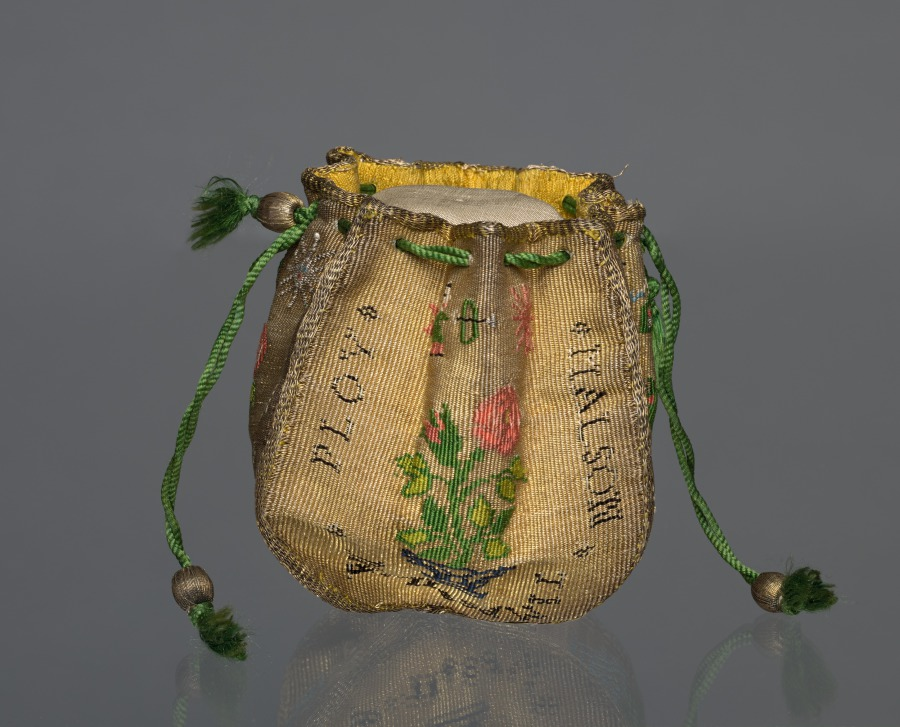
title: Woven Purse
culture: France, 18th century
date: 1700s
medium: tapestry, silk and gold thread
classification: Garment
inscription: woven in black along edges and repeated on alternating sides: "le if cherche un coeur fidele" alternates with "il employ mal sou temps."